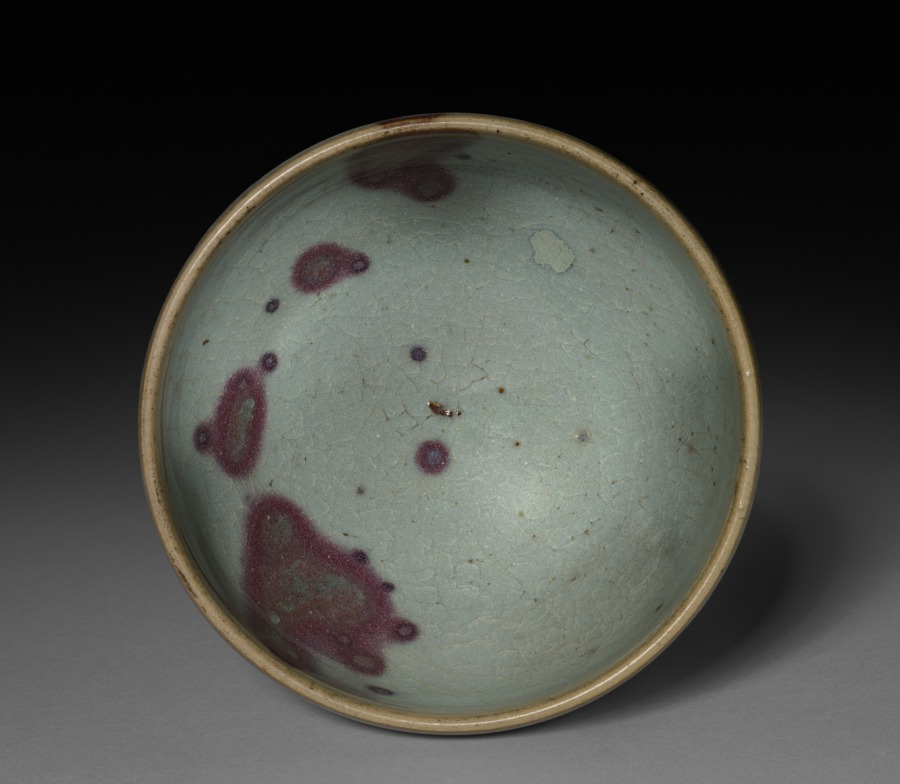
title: Bowl: Jun ware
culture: Northern China, Jin dynasty (1115-1234) - Yuan dynasty (1271-1368)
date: 13th - 14th century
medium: glazed buff stoneware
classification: Ceramic